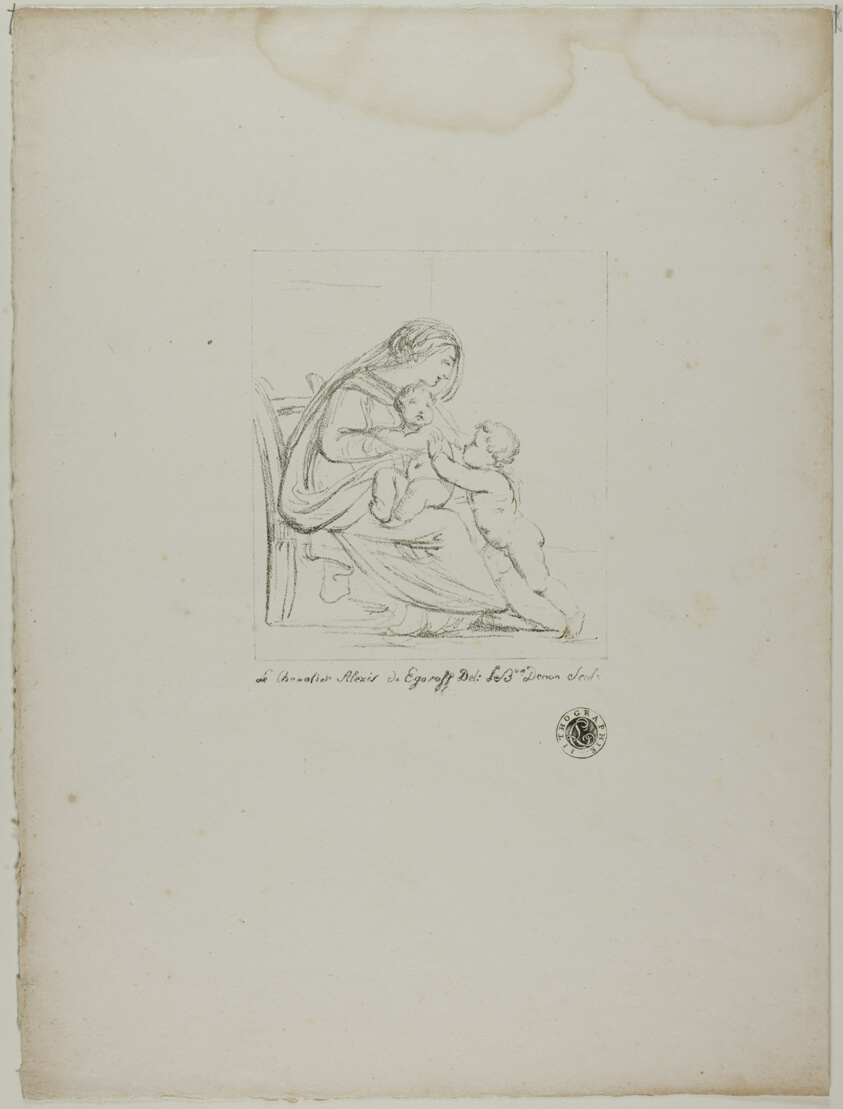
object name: Print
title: Seated Virgin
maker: Dominique-Vivant Denon (French, 1747-1825); after Alexis d'Egaroff (French, 18th-19th centuries)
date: 1817–20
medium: Lithograph in black on ivory wove paper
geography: France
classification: lithograph; print; prints and drawing